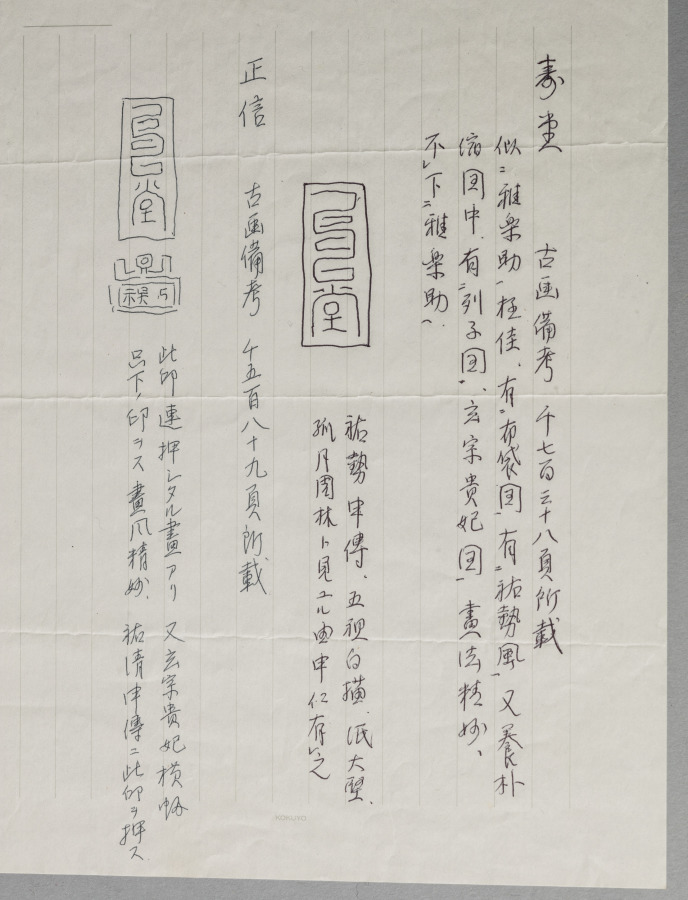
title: Landscape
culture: Japan, Muromachi period (1392–1573)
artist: Judō (Japanese, active 16th century)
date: 1500s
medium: hanging scroll, ink and light color on paper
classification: Painting